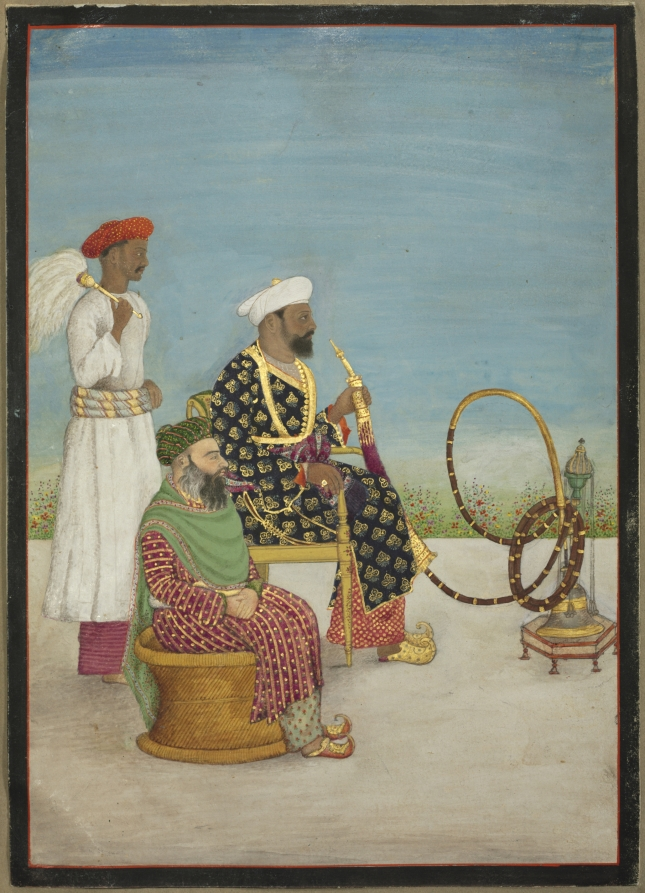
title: Portrait of Hafiz Abd al-Rahim Khan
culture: India, Company School, Delhi, 19th century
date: c.1815–1820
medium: Gum tempera and gold on paper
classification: Painting